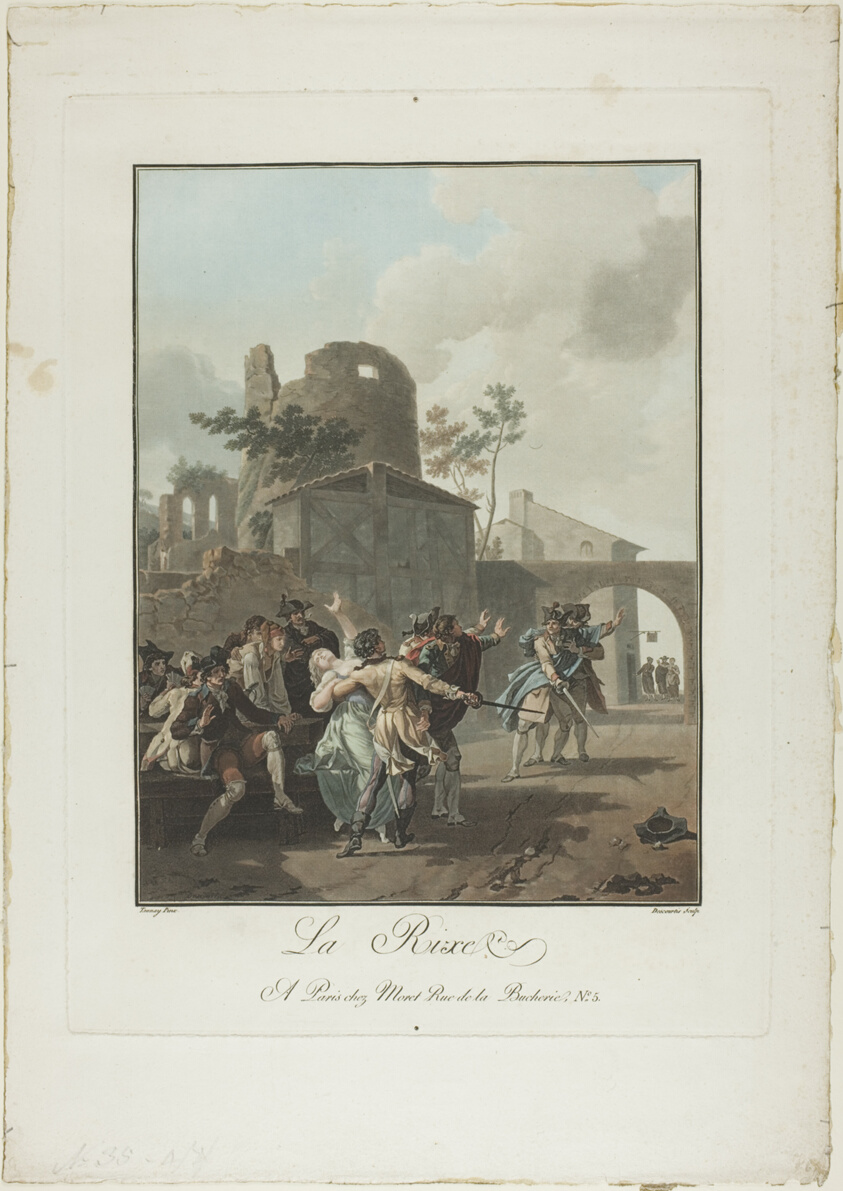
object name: Print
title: La Rixe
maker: Charles-Melchior Descourtis (French, 1753-1820); Charles Auguste Taunay (French, 1769-1824)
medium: Color aquatint with etching and engraving in black ink on ivory wove paper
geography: France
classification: aquatint; print; prints and drawing